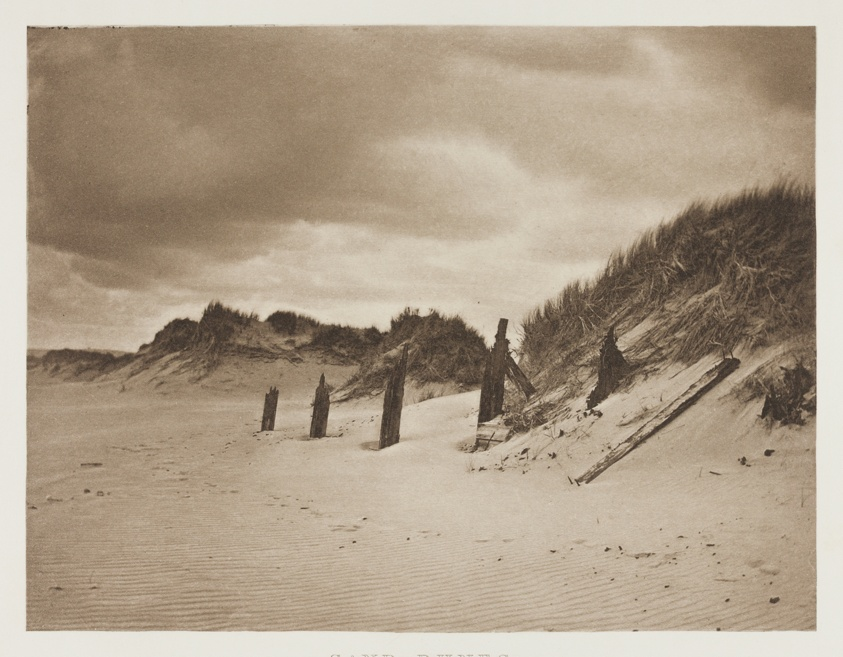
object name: Photograph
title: Sand Dunes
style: 19th century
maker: B. Gay Wilkinson (English, 1857–1927)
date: c. 1880/90, printed January 1891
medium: Photogravure, from "Sun Artists, Number 6" (1891)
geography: England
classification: photogravure; photomechanical process; photography; photograph